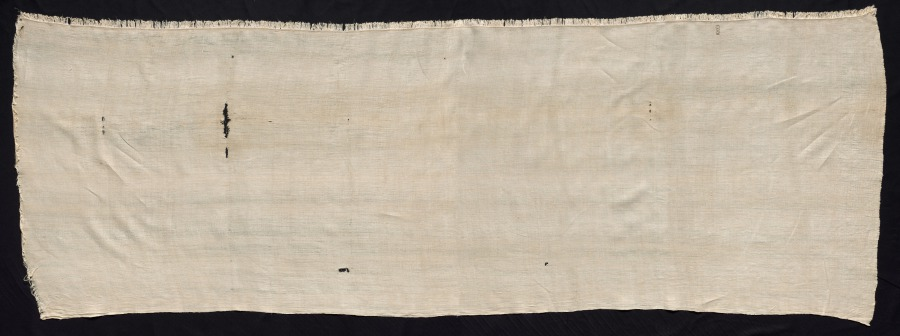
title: Mummy Linen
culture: Egypt, New Kingdom (1540–1069 BCE), Dynasty 18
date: 1540–1296 BCE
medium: plain weave: linen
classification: Textile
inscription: bears the cartouche of Mem-Kheper-Ra (Thothmes III).